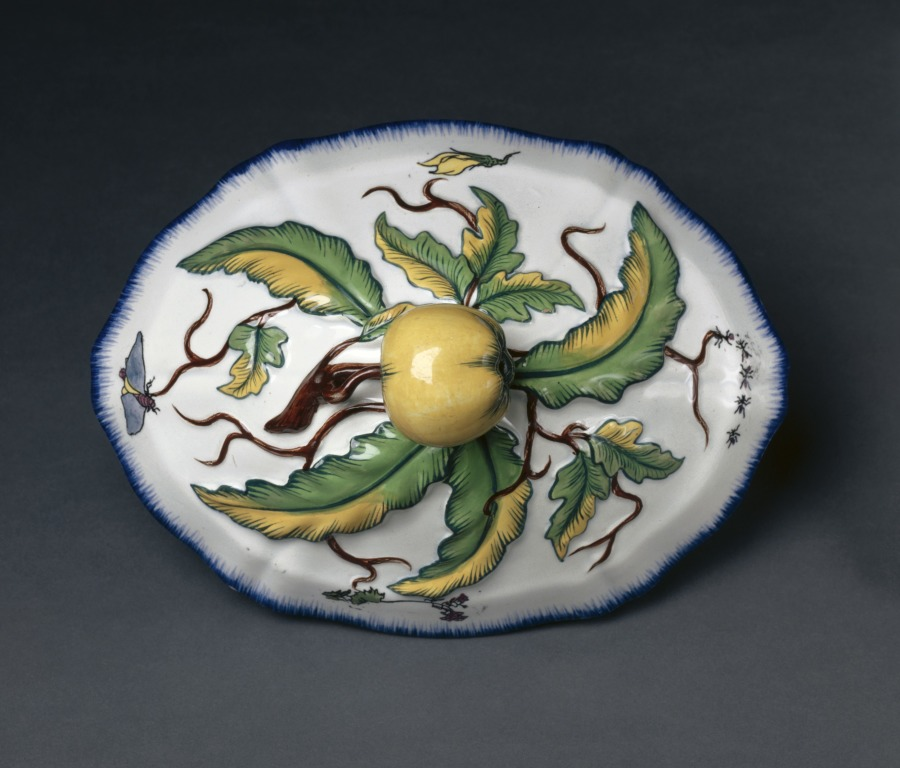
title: Cover for a Tureen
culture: France, Creil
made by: Creil Factory (French)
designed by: Félix Bracquemond (French, 1833–1914)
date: 1866–75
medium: porcelain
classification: Ceramic